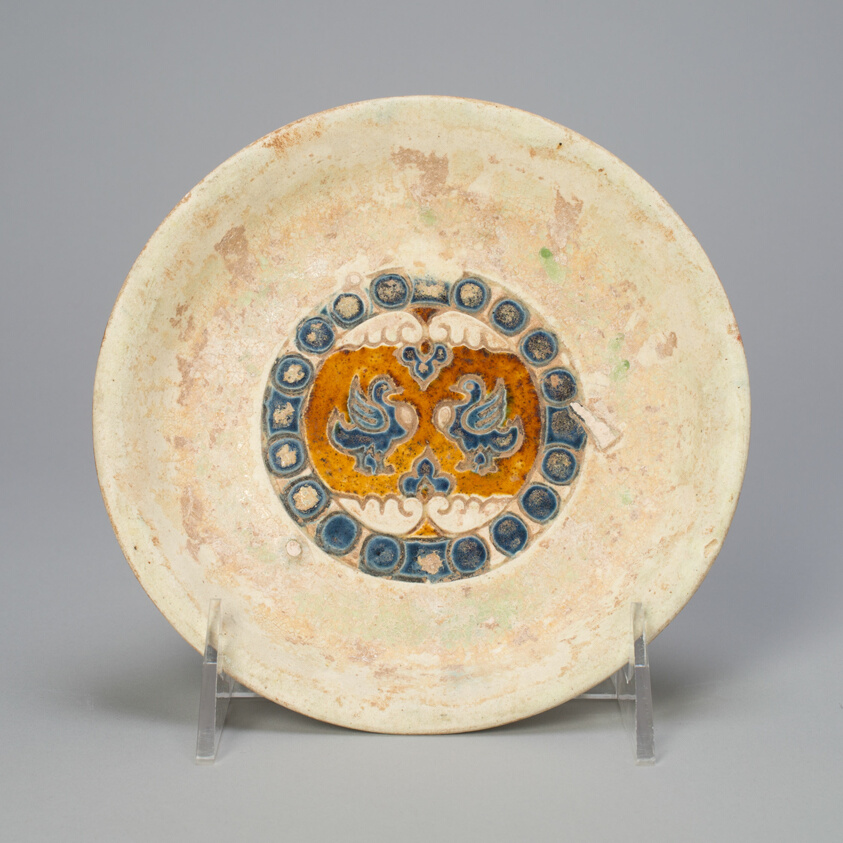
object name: Vessel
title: Dish with Two Birds Encircled by Beaded Roundels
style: Chinese (culture or style)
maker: China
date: Tang dynasty (618–907)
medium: Slip-coated earthenware with cobalt blue and lead amber glazes and underglaze mold-impressed decoration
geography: China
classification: dish (vessel); earthenware; asian art; ceramics; vessel